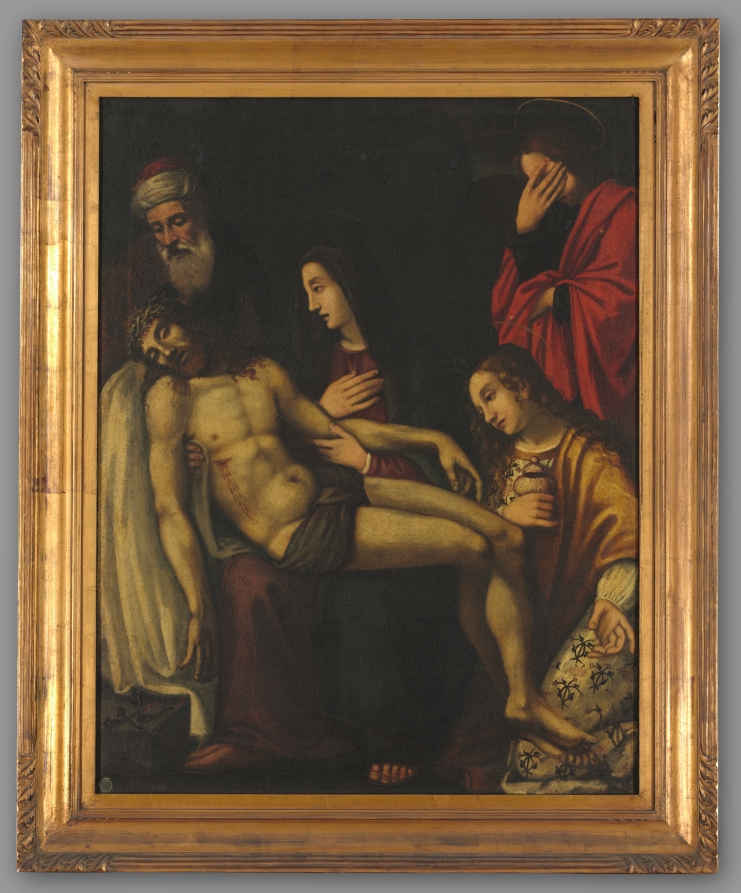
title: Pietà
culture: possibly Italy, Florence, late 16th century, or later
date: late 1500s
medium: oil on canvas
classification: Painting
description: Originating in Germany in the 1300s, the intense moment of lamentation, often referred to as a pietà, has no origin in the Bible. Though it was more widespread in northern Europe, the poignant scene of Mary holding the body of her deceased son expanded into Italy as well. In this painting, Nicodemus supports Christ's upper body, Mary clasps her son's elbow as he lies across her lap, Mary Magdalene kneels at Christ's feet, and John the Apostle covers his face in grief behind her. The crown of thorns upon Christ's head and the blood still visible from his wounds recall the events of the Passion and highlight the sorrow of the Virgin.